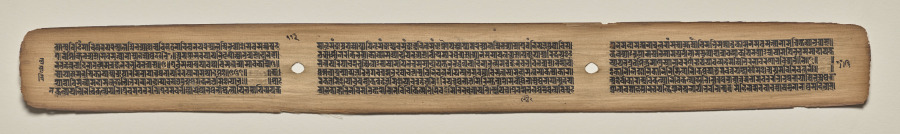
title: Text, Folio 113 (verso), from a Manuscript of the Perfection of Wisdom in Eight Thousand Lines (Ashtasahasrika Prajnaparamita-sutra)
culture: Eastern India, Bihar, Vikramashila Monastery. Painting: Nepal, Kathmandu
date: Sunday, September 14, 1119 (year 239 of the Newar Samvat in the month of Ashvina)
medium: gum tempera and ink on palm leaves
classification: Painting